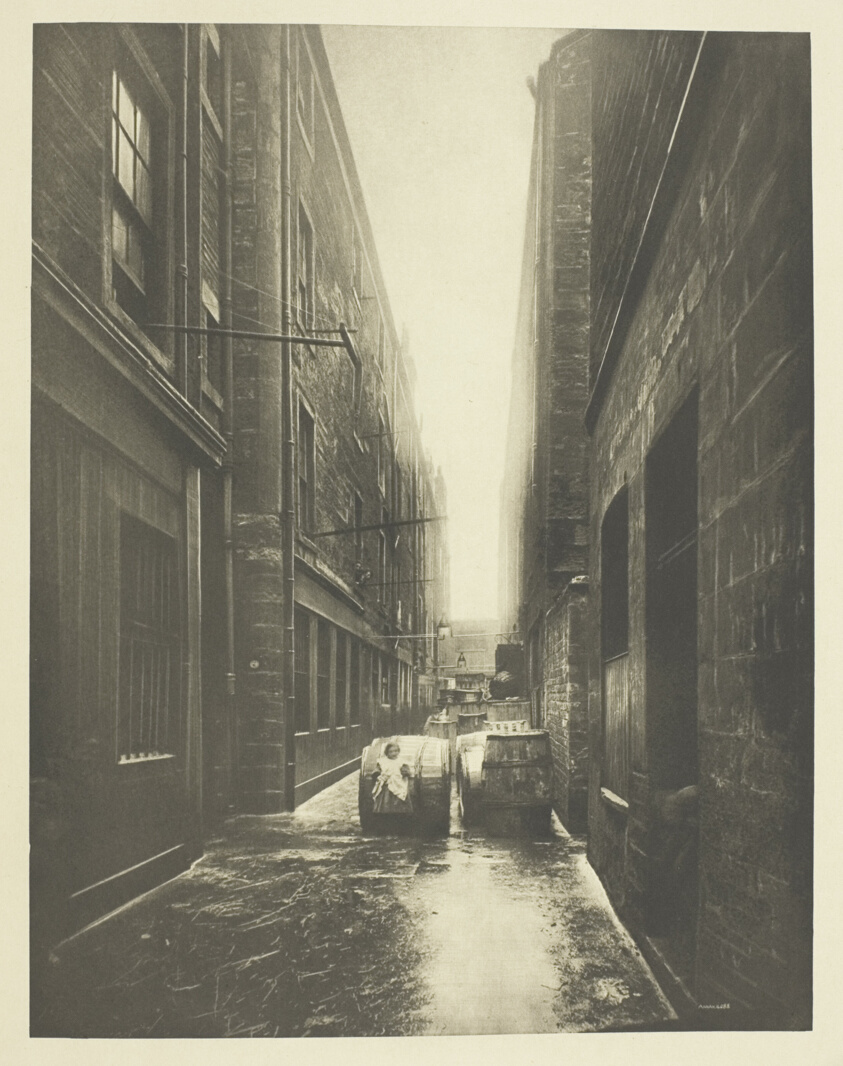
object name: Photograph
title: St. Margaret's Place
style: 19th century, Pictorialism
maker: James Craig Annan (Scottish, 1864-1946)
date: 1897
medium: Photogravure, plate 45 from the book "The Old Closes & Streets of Glasgow" (1900)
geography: Scotland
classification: photograph; photography